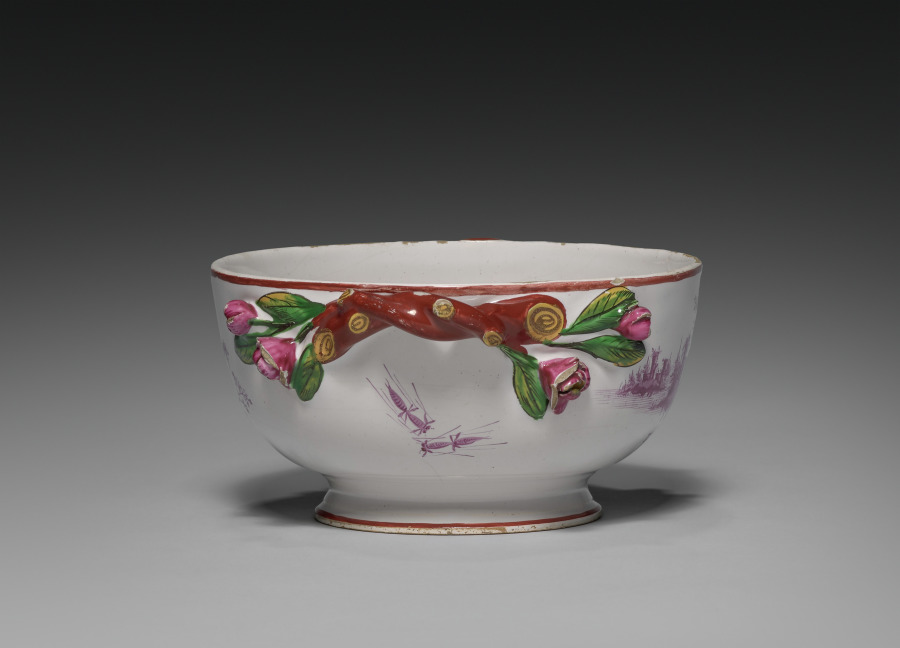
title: Bowl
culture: France, 18th century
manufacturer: Saint-Clément Factory (French)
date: c. 1775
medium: tin-glazed earthenware (faience) with enamel decoration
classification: Ceramic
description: The faience factory at Saint-Clément in eastern France closely imitated the styles and techniques employed by the Hannong's at Strasbourg. The monochrome landscapes in red on this covered bowl demonstrate the influence of German, in this case Meissen, porcelain on the faience made in this part of France.